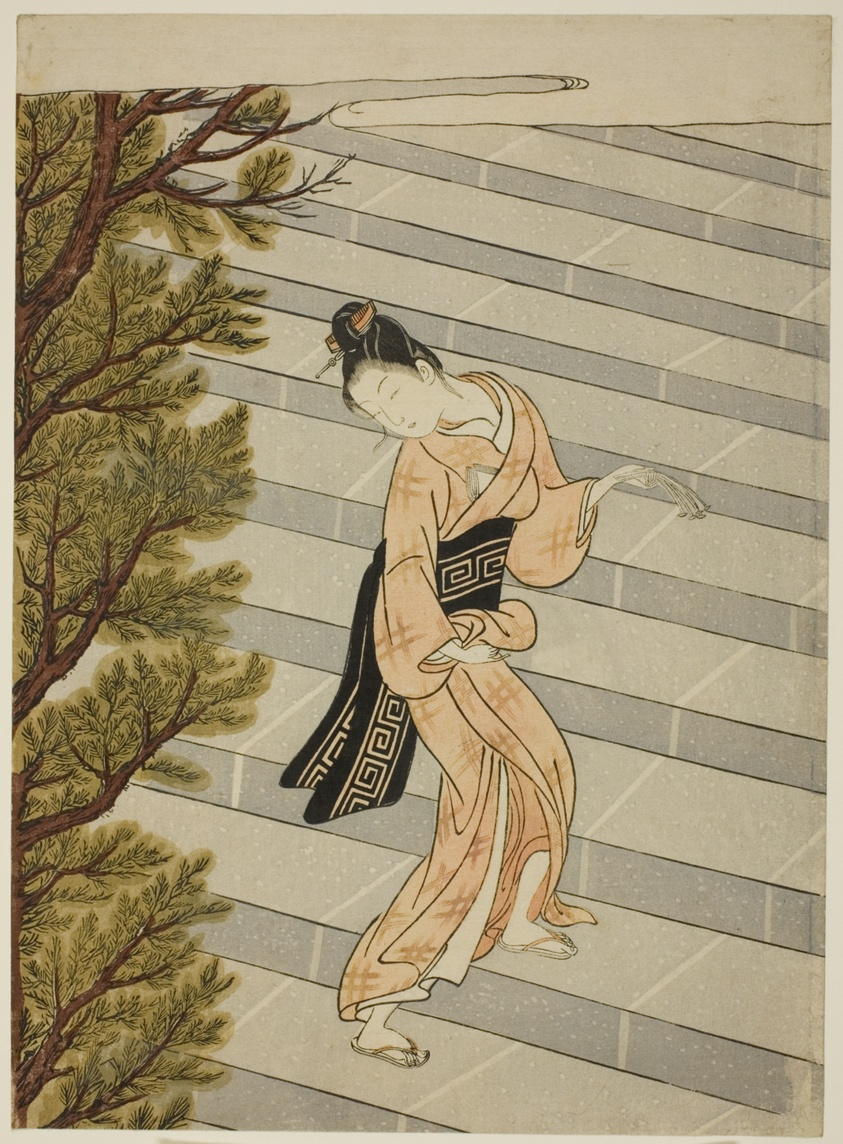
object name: Print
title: Climbing the steps one hundred times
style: Japanese (culture or style)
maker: Suzuki Harunobu 鈴木 春信; Japanese, 1725 (?)-1770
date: c. 1765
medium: Color woodblock print; chuban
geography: Japan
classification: woodblock print; print; asian art